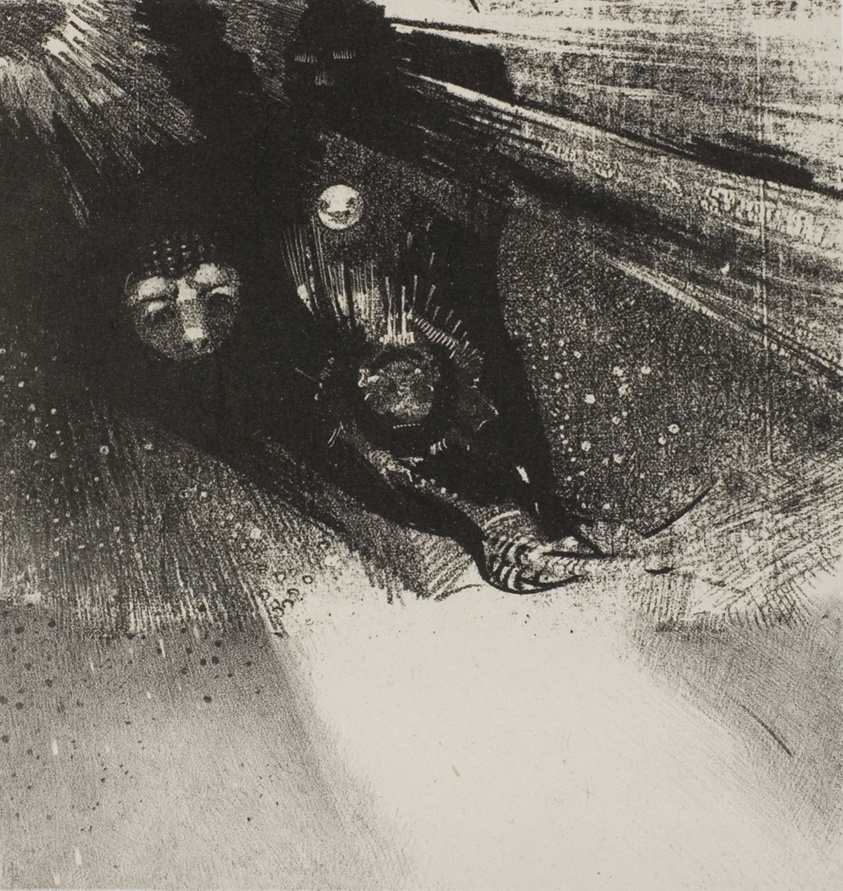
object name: Print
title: Larvae So Bloodless and So Hideous, plate 5 of 6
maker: Odilon Redon (French, 1840-1916)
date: 1896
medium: Lithograph in black on ivory China paper laid down on white wove paper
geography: France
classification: lithograph; print; prints and drawing; paper